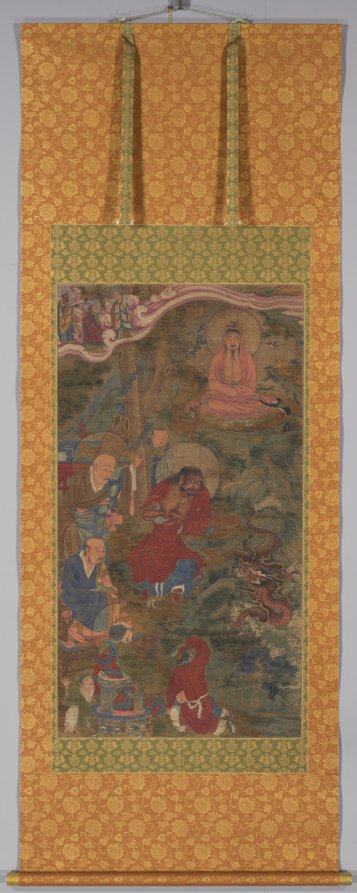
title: Miracle of the Dragon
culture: China, Ming dynasty (1368–1644)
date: 1600s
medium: Hanging scroll; ink, color, and gold on silk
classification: Painting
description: Buddhist disciples are grouped around a dragon in the lower right part of the scroll. The figures' varying levels of composure at the miraculous appearance of the dragon indicates how far removed each figure is from worldly affairs. The lay people's body language expresses their surprise. In contrast, the historical Buddha, Shakyamuni, in the upper right has been seated in meditation for such a long time that birds have begun assembling twigs for a nest atop his head. His eyes remain closed, and his body still, unmoved by either the sudden materialization of the dragon or the proximity of the monkey, deer, and birds. Dragons have been part of Buddhist culture since antiquity; in Chinese Buddhism the dragon is often interpreted as a symbol of enlightenment.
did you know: The generous application of brilliant mineral pigments is still evident throughout this painting.